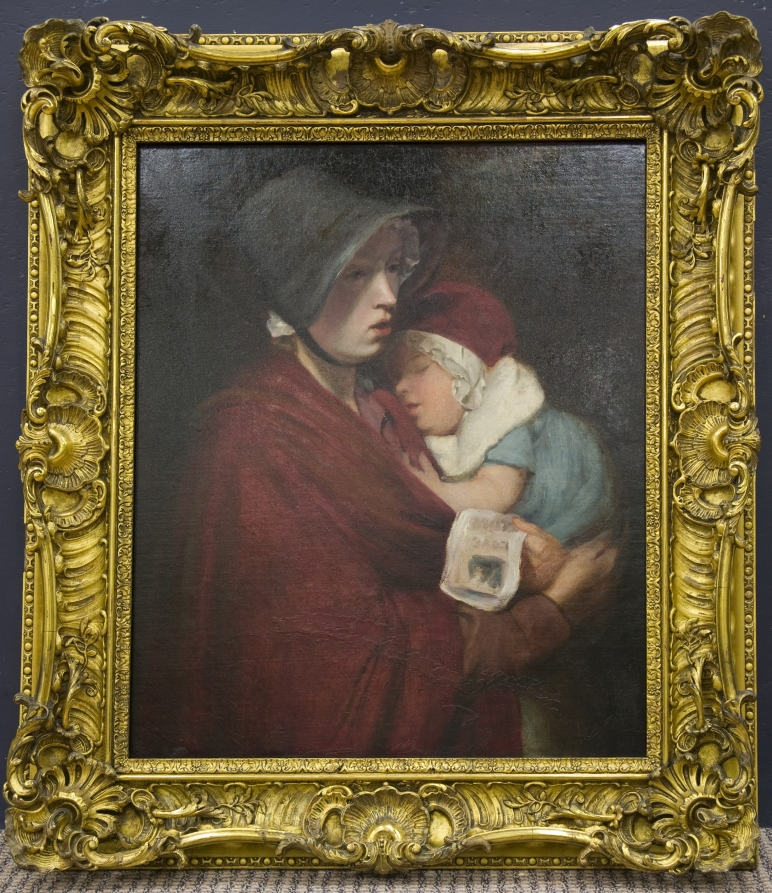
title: Street Singer and Child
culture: England, 18th century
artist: John Opie (British, 1761–1807)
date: 1700s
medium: oil on canvas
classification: Painting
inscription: Inscribed across book: "LOVE/CLOWN (N or R).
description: John Opie's working-class roots made him sympathetic to the plight of the laborer. This painting demonstrates his interest in an honest portrayal of British street life, a sympathy rarely seen in the work of other British artists of his generation, who often presented lower classes more coldly. Much of Britain's population at this time was poor, but beggars and street vendors had a particularly low status. Street singers were often sellers of goods. By focusing the composition tightly on the woman and not including any wares, Opie makes the viewer recognize her humanity; moreover, he emphasizes the connection between mother and child. The singer is working to feed her baby, evoking sympathy from the viewer.